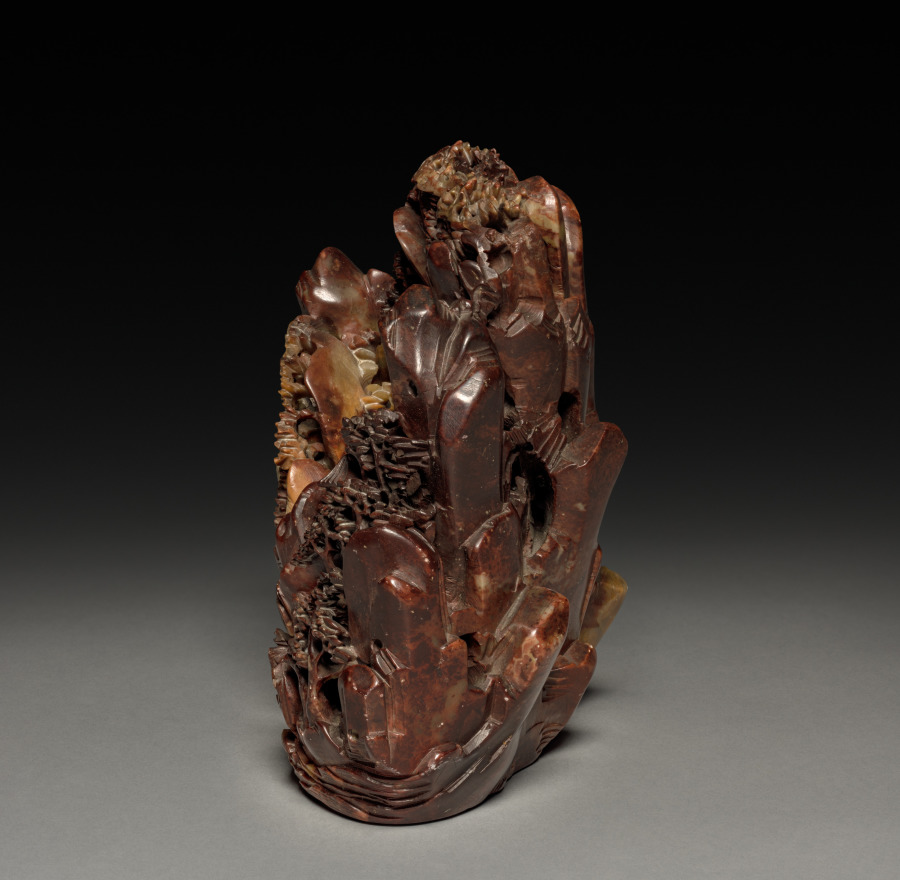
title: Landscape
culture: China, Qing dynasty (1644-1911)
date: 1644–1911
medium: soapstone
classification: Stone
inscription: 石門洞天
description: A mountain scenery surrounded by water and fish is meticulously carved out of soapstone, with a pond, bridge, waterfall, and temple front in its center. The unidentified figure scene on the left includes an ox and a man wearing what appears to be a Korean hat. A Buddha figure hidden in the depth of the temple can be glimpsed from the backside. The inscribed pillar on the right reads “Stonegate Cave to Heaven (shimen dongtian)”. Indentations all over the stone suggest that the miniature mountain was once adorned with precious stones and metal, presumably representing an earthly paradise to which one could escape in one’s mind and imagination.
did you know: A waterfall plummets down the cliff by the temple and then flows smoothly down to join the river at the front of the landscape scene.